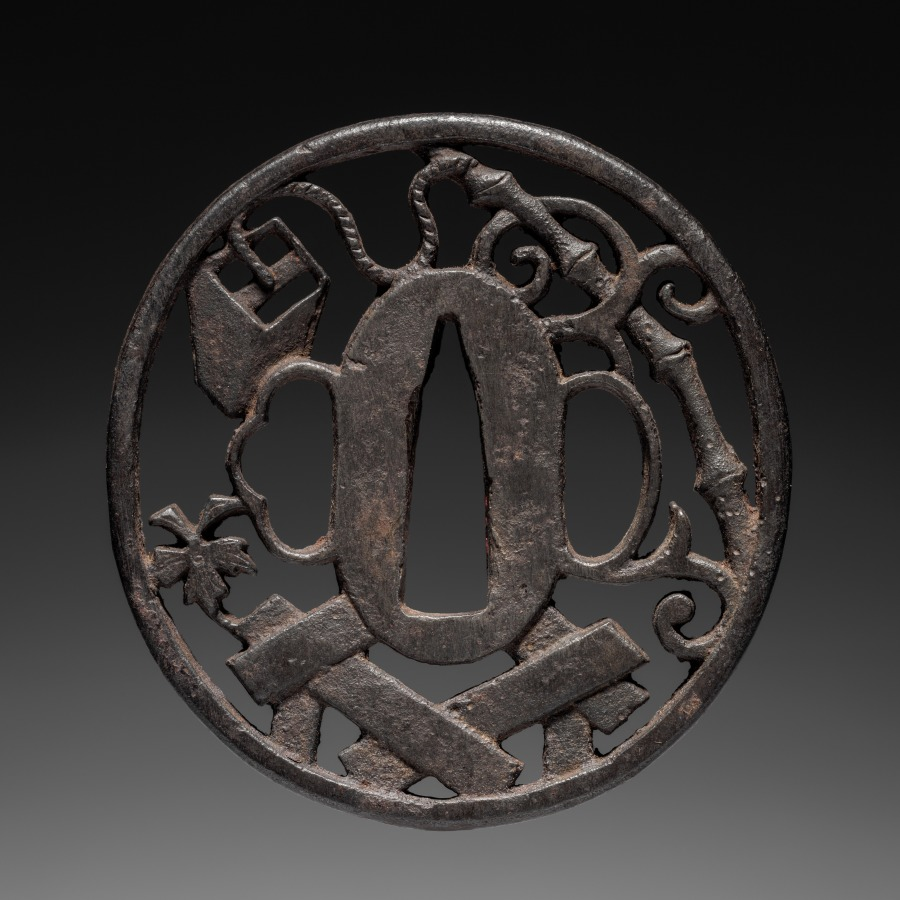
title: Sword Guard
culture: Japan, Edo period (1615–1868)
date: 1615–1868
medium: iron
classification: Arms and Armor